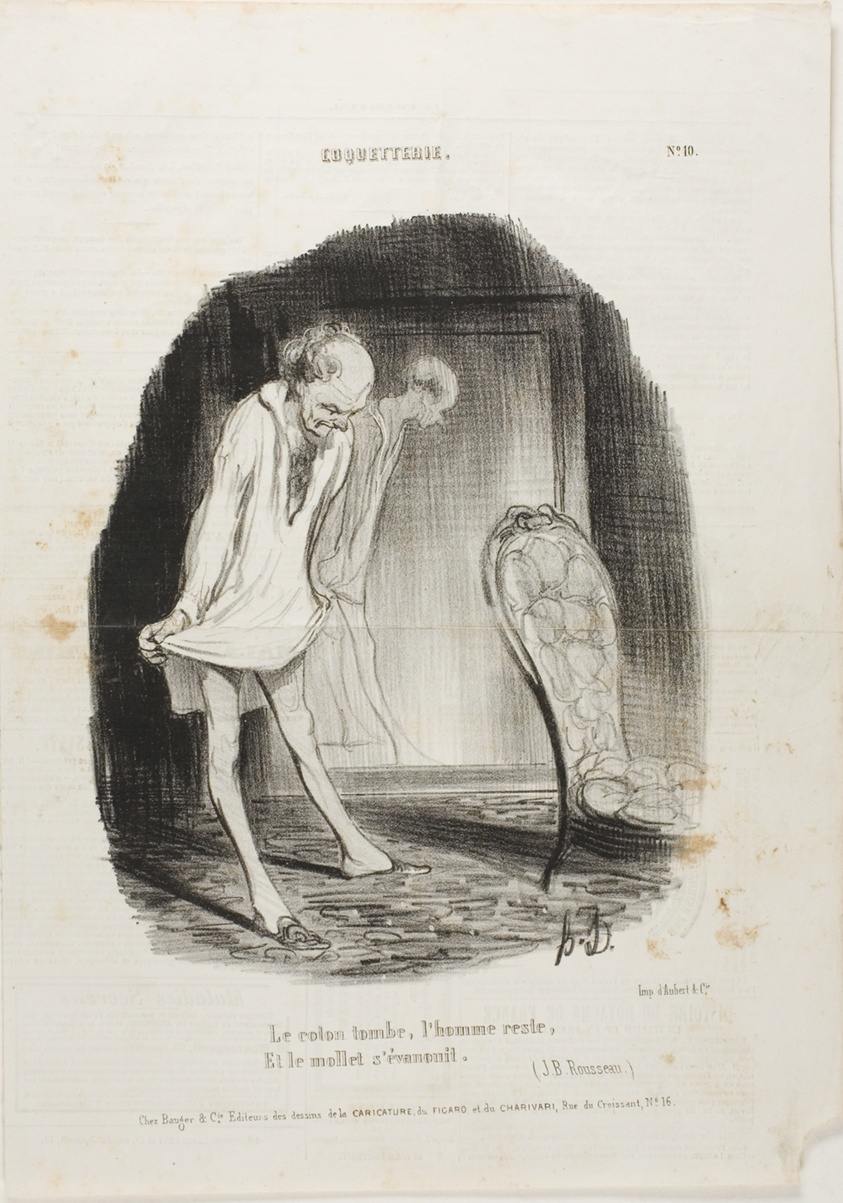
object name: Print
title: The Gown Falls, Man Remains, and the Legs are Shaking. (J.B. Rousseau), plate 10 from Coquetterie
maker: Honoré Victorin Daumier; French, 1808-1879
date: published October 18, 1840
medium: Lithograph in black with scraping on stone on cream wove paper, with text added in another hand and letterpress verso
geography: France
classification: lithograph; print; prints and drawing